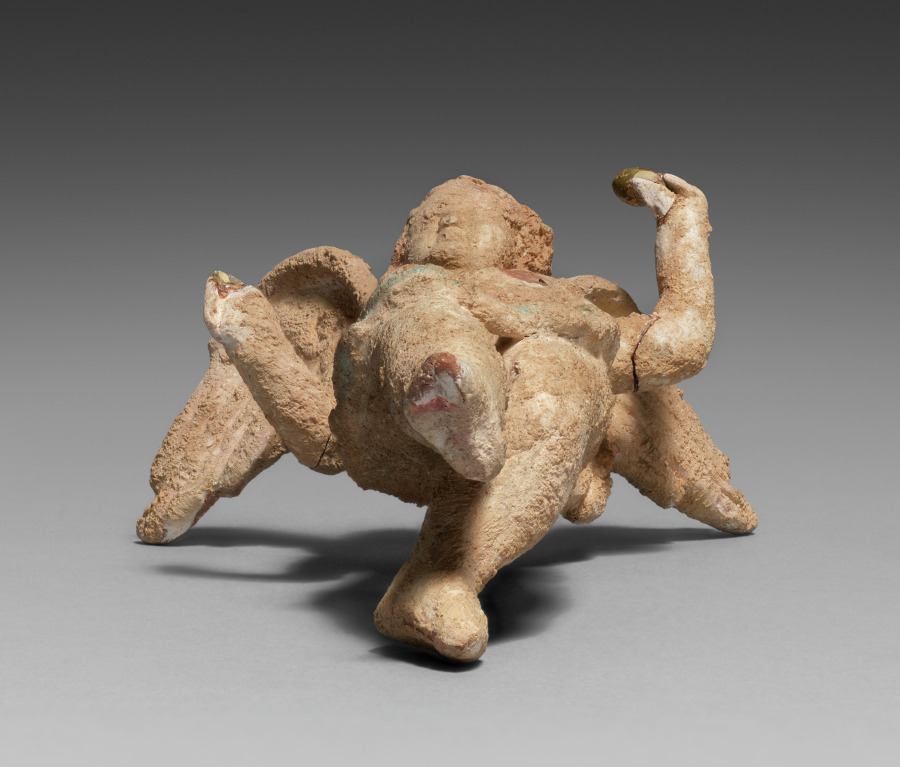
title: Figurine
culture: Greece, Myrina, Hellenistic period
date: late 400s–300s BCE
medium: terracotta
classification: Sculpture